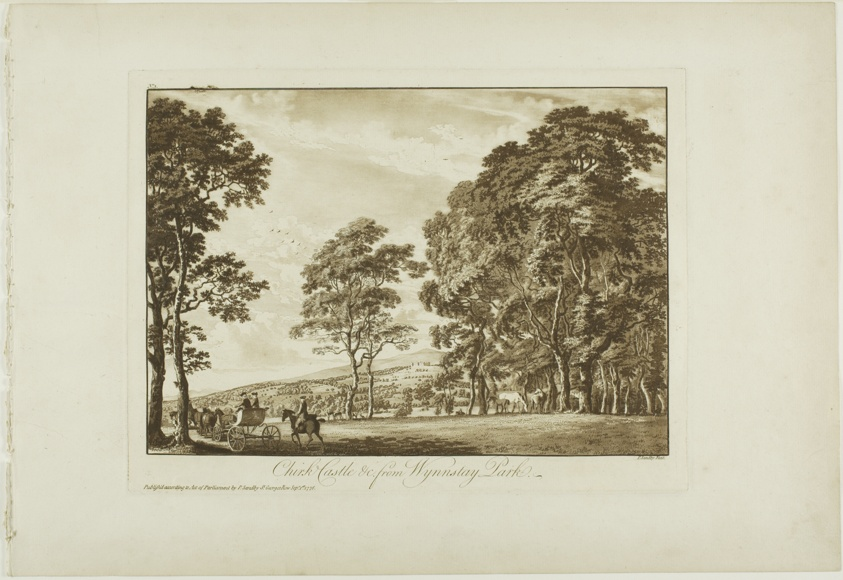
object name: Print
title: Chirk Castle and c. from Wynnstay Park, plate three from Twelve Views in North Wales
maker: Paul Sandby (English, 1731-1809)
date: 1776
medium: Aquatint with etching on ivory laid paper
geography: England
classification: etching; print; prints and drawing